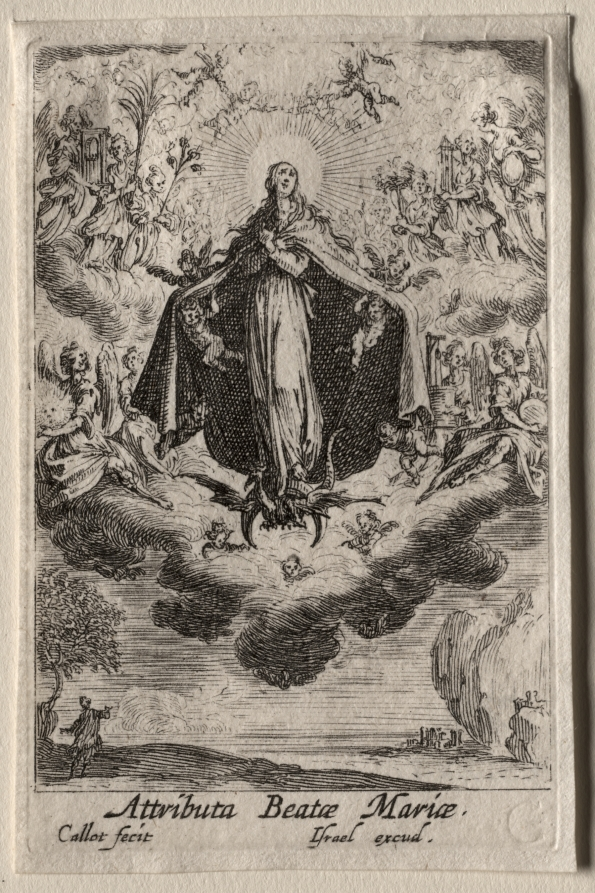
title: The Life of the Virgin: The Attributes of the Virgin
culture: France, 17th century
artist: Jacques Callot (French, 1592–1635)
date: ca. 1633–34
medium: etching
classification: Print